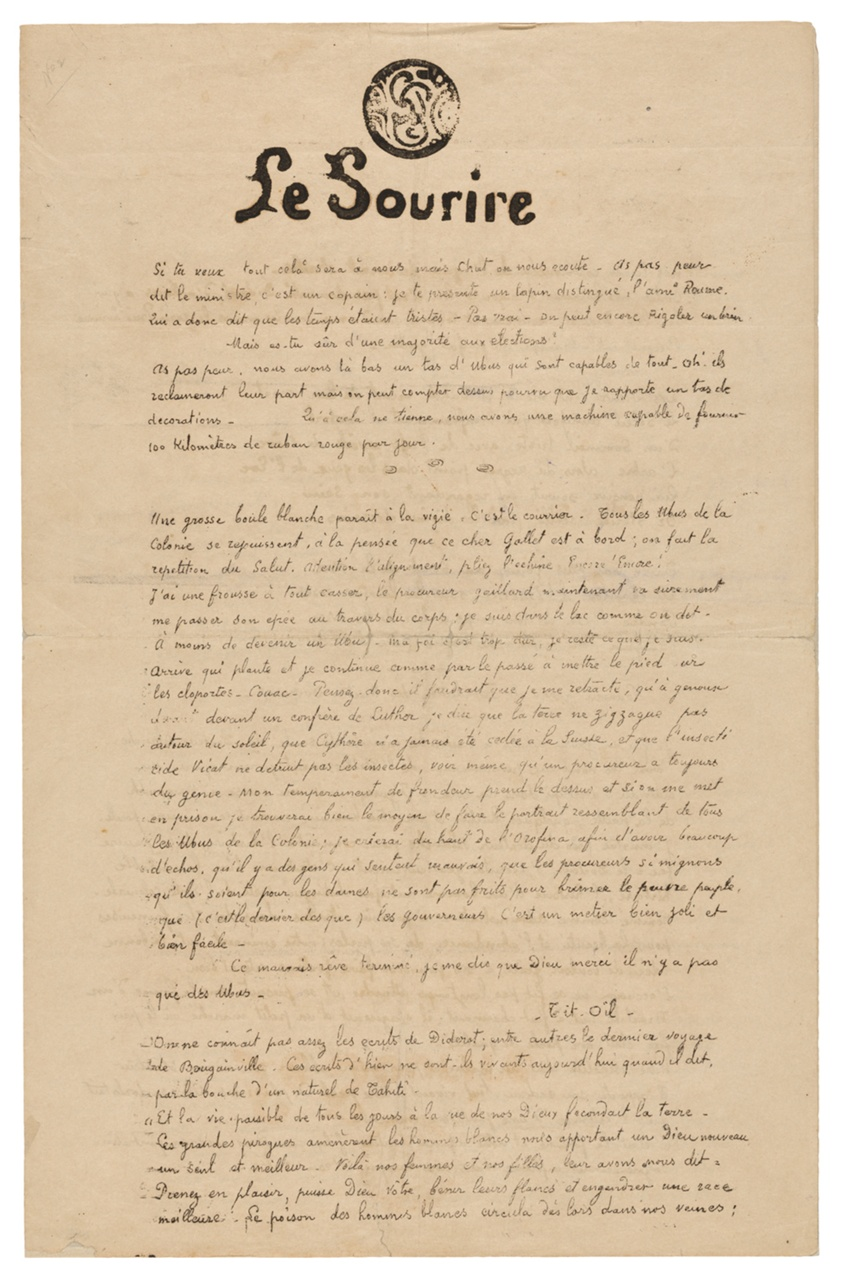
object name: Print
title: Le sourire: Journal sérieux, Nov. 1899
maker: Paul Gauguin (French, 1848-1903)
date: 1899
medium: Mimeograph in brownish-black ink, with wood-block prints in black ink on cream wove paper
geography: France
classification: woodcut; print; prints and drawing